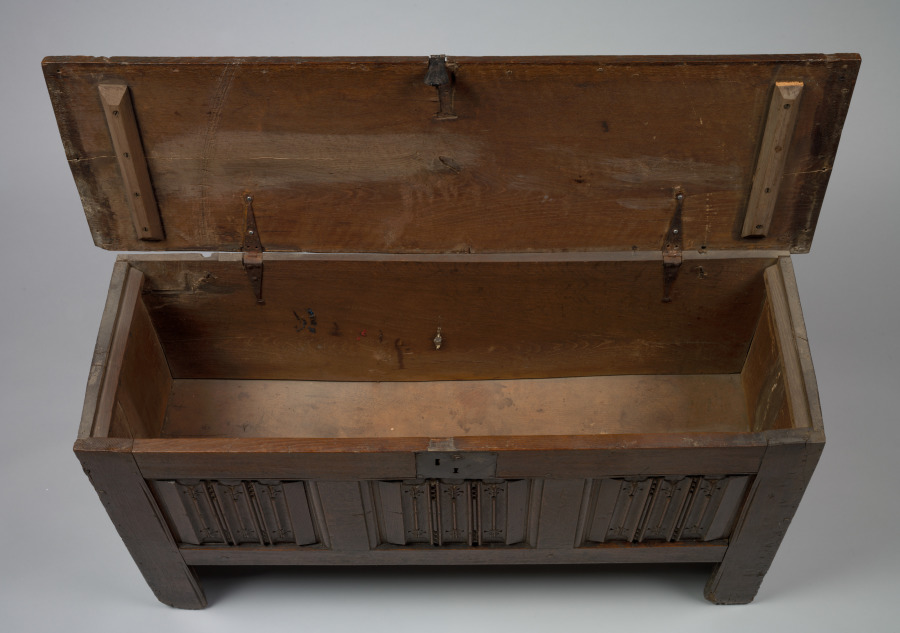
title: Chest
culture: England, late 15th - early 16th centuries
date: c. 1490–1520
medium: oak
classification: Furniture and woodwork